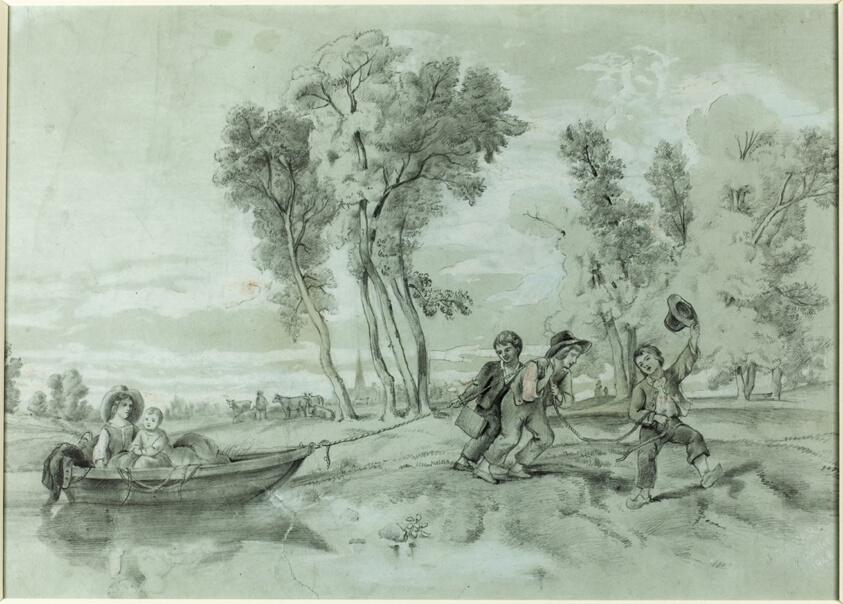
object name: Drawing and Watercolor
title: A Country Scene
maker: John La Farge (American, 1835-1910)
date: July 1848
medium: Graphite with smudging, heightened with lead white gouache, on blue wove paper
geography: United States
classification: graphite; prints and drawing; paper